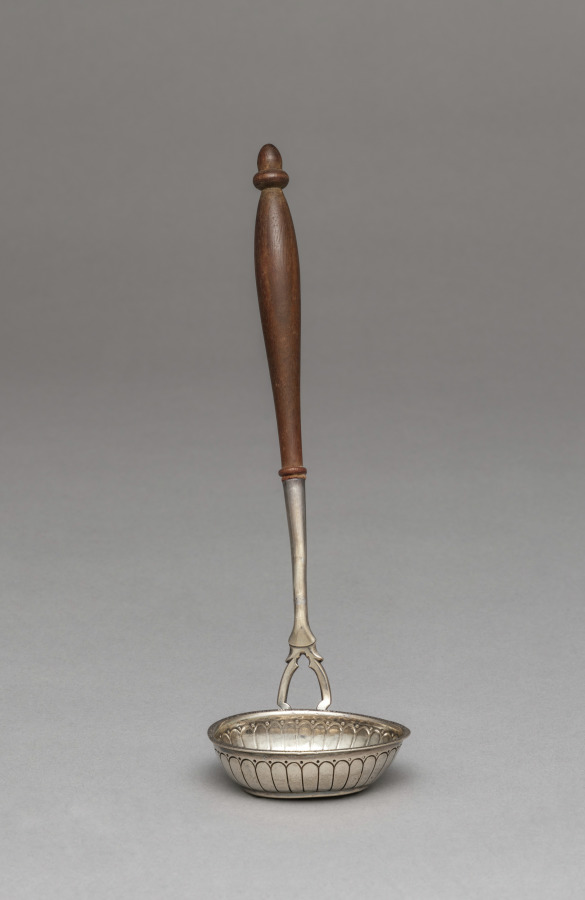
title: Ladle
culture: England, Exeter, 18th century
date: 1741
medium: silver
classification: Silver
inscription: engraved around edge: "The British Glory reviv'd by Admiral Vernon. He took Porto Bello with six ships only."